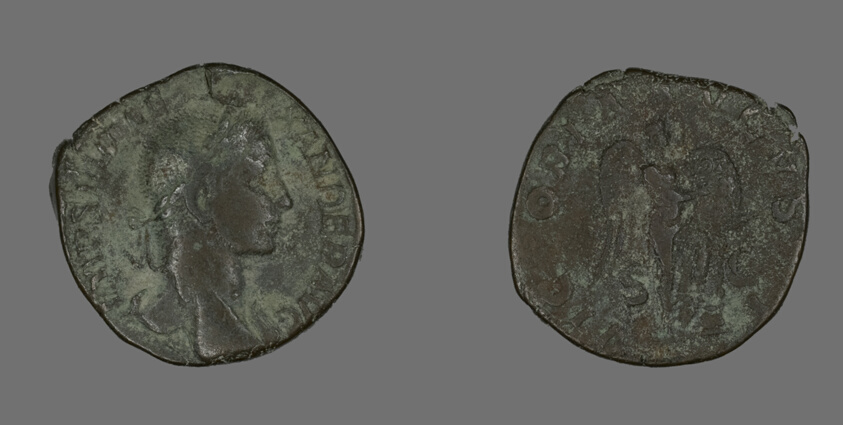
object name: Coin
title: Sestertius (Coin) Portraying Emperor Severus Alexander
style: roman (ancient, style or period)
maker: Roman, minted in Rome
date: 230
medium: Bronze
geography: Roman Empire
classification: coin; ancient art